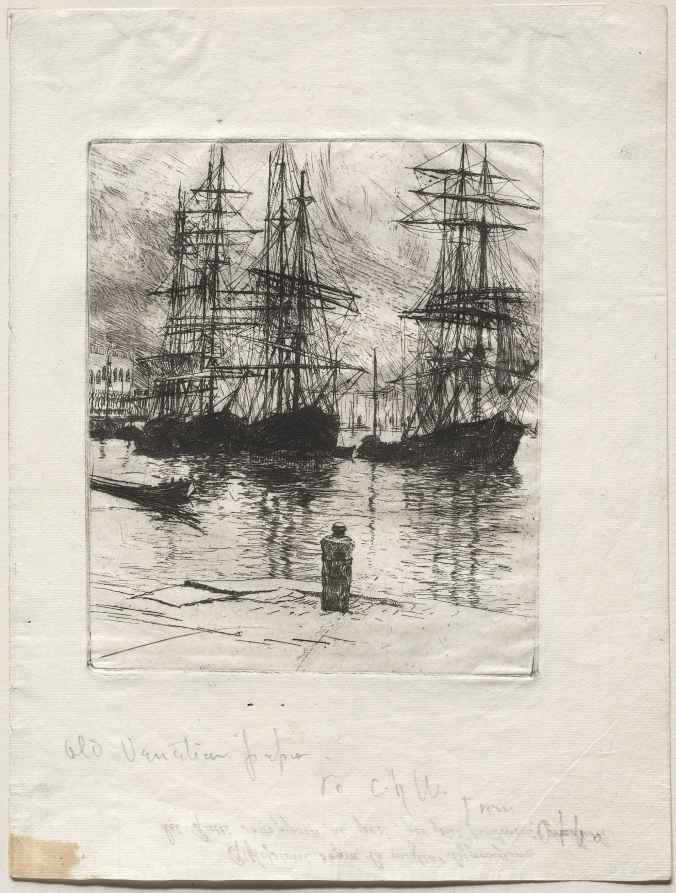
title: Three Ships, Venice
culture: America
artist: Otto H. Bacher (American, 1856–1909)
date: 1880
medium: etching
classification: Print